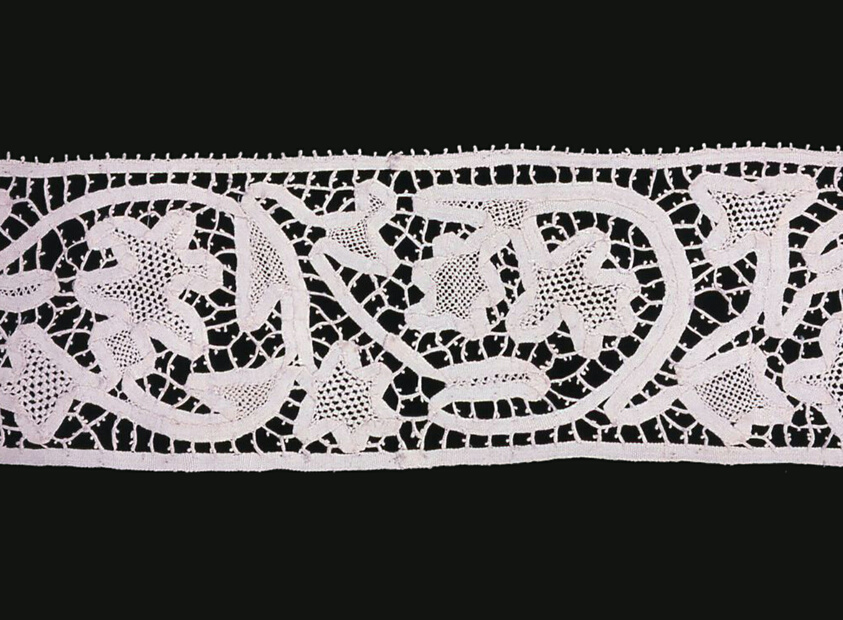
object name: Textile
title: Border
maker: Europe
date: 1875/1900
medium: Linen, needle lace with woven tape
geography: Europe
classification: textile; lace - mixed; lace